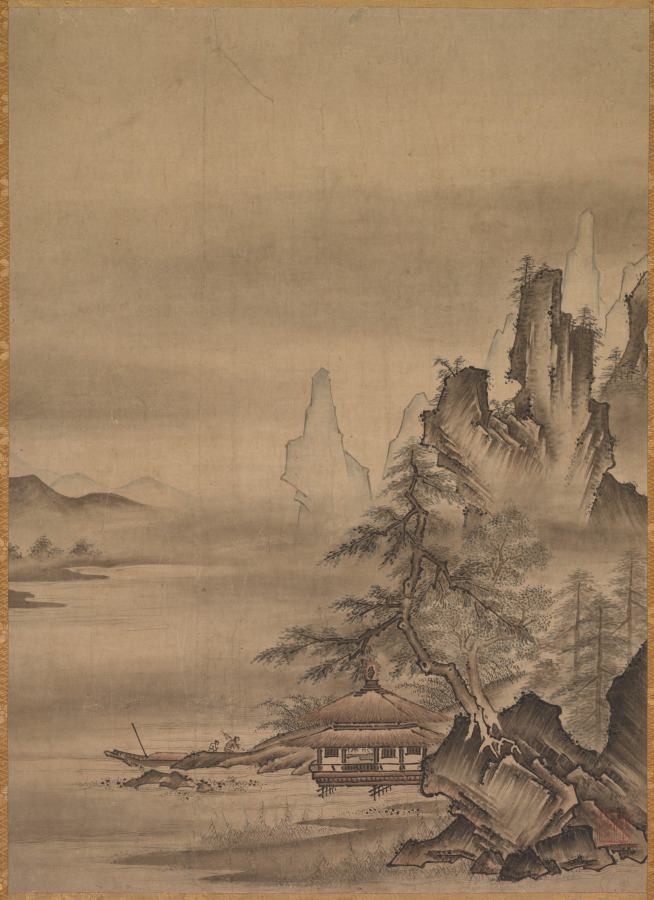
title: Returning Home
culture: Japan, Muromachi period (1392–1573)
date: mid-1500s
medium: hanging scroll, ink and color on paper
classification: Painting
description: This painting bears a seal reading Shōkei. The style of the seal resembles that used by Kenkō Shōkei (active about 1470–after 1523), a monk and painter at the Zen temple Kenchōji in Kamakura who studied in Kyoto for three years with Geiami (1431–1485?), painter to the shogun as well as curator of the shogun’s collection of art. However, the seal was carved to look like Shōkei’s and added to the painting at a later date by someone who thought the unsigned landscape was similar to his work. The painting has compositional and some stylistic similarities to images by other Kanto-based artists like Maejima Sōyū (active mid-1500s), who trained with Kano school artists. Specifically, the pines clinging to the massive boulder in front of a pavilion with mountains receding into atmospheric space—in a composition weighted in a single corner of the painting—is a Kanto-inflected derivation of the painting of the Zen monk-painter Tenshō Shūbun (active about 1414), whose work was a major inspiration for Kano school painters.